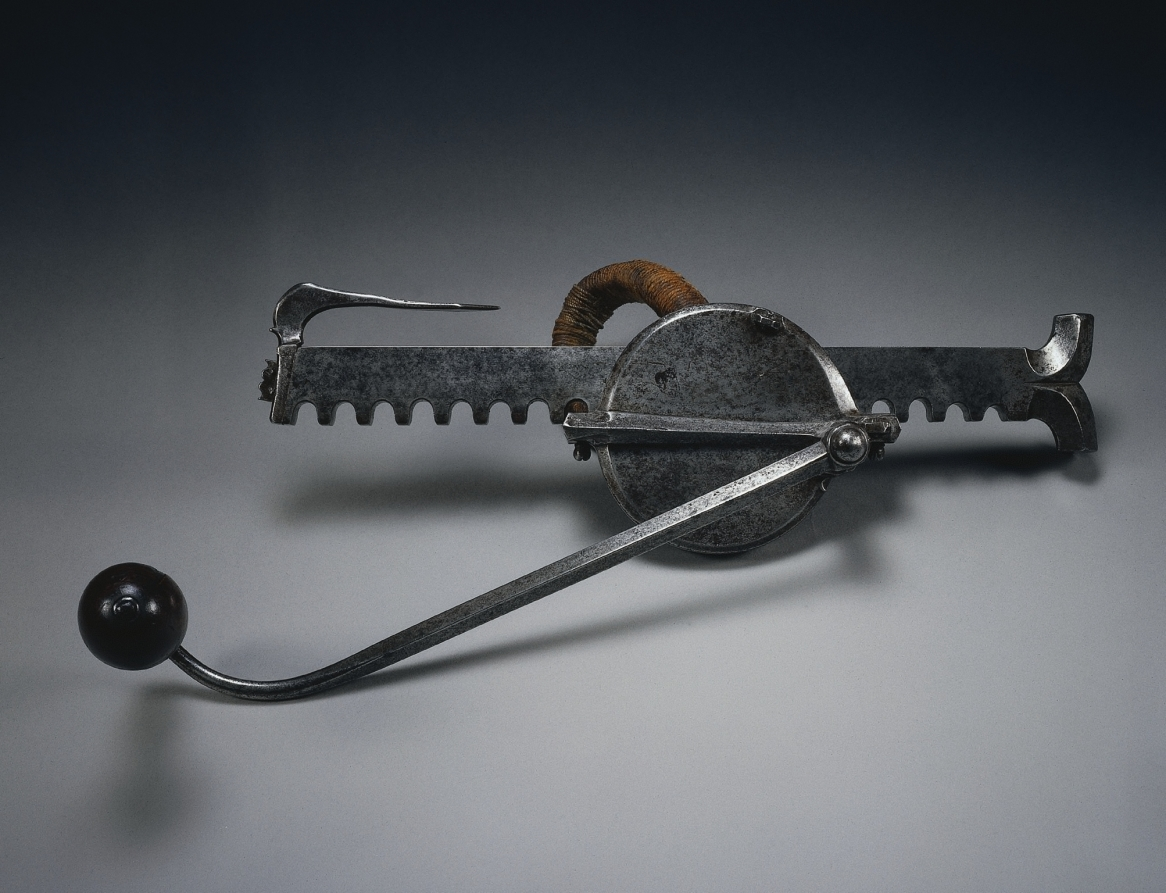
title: Cranequin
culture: Germany, Nuremberg (?), 16th century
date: c. 1580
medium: steel, flax cord, wooden handle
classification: Arms and Armor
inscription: gear case inscribed with later owner's name: CW Siball, 1665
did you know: The maker's mark says HW and may belong to Hans Wirsing, a craftsman from Nuremburg.